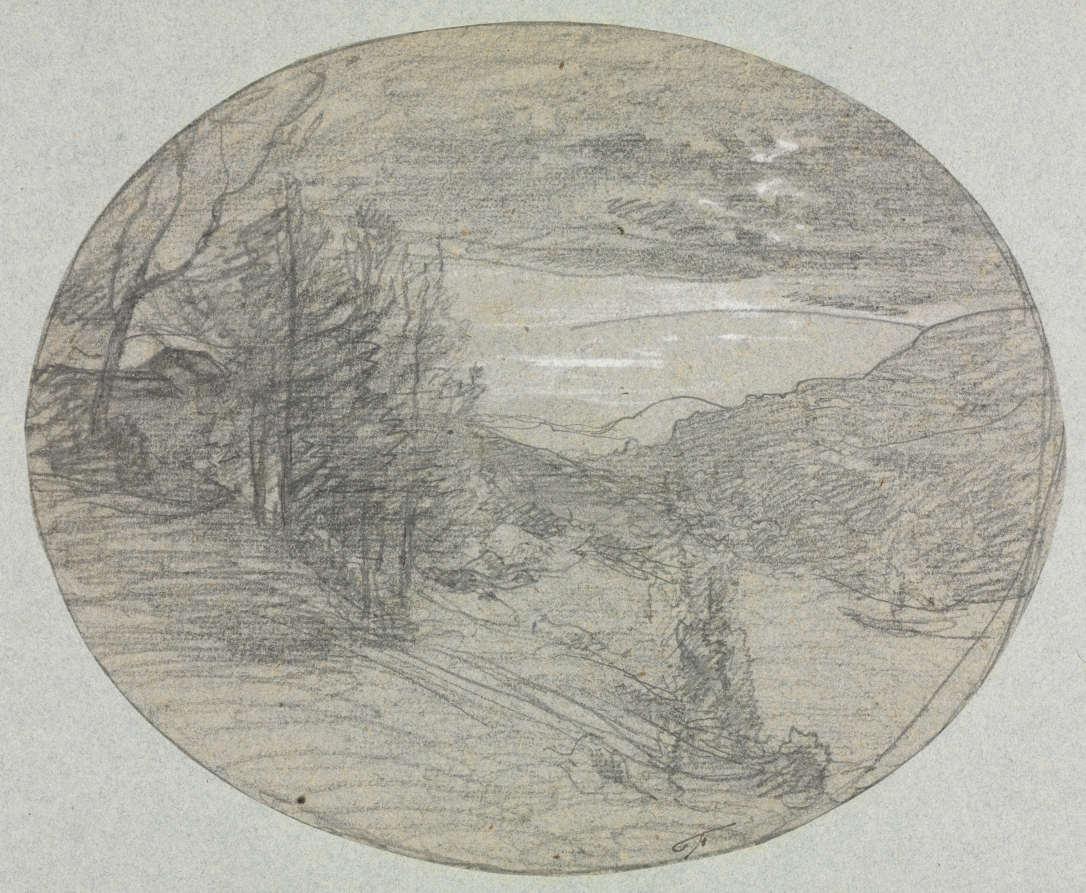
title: Landscape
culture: France, 19th century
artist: François-Auguste Ravier (French, 1814–1895)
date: 1800s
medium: black chalk and graphite with white chalk and traces of pen and black ink; framing lines in graphite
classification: Drawing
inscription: lower right, in black ink: [F?] ; lower right, in graphite: [illegible] ; VERSO OF SECONDARY SUPPORT, center right, in graphite: Ravier